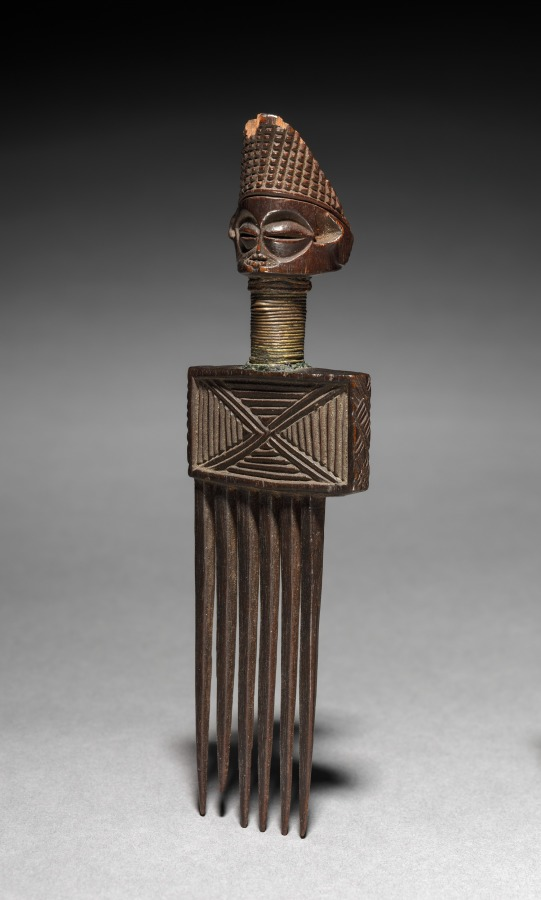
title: Comb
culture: Africa, Central Africa, Democratic Republic of Congo, Luba-style maker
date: c. 1900s?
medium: Wood and wire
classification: Tool